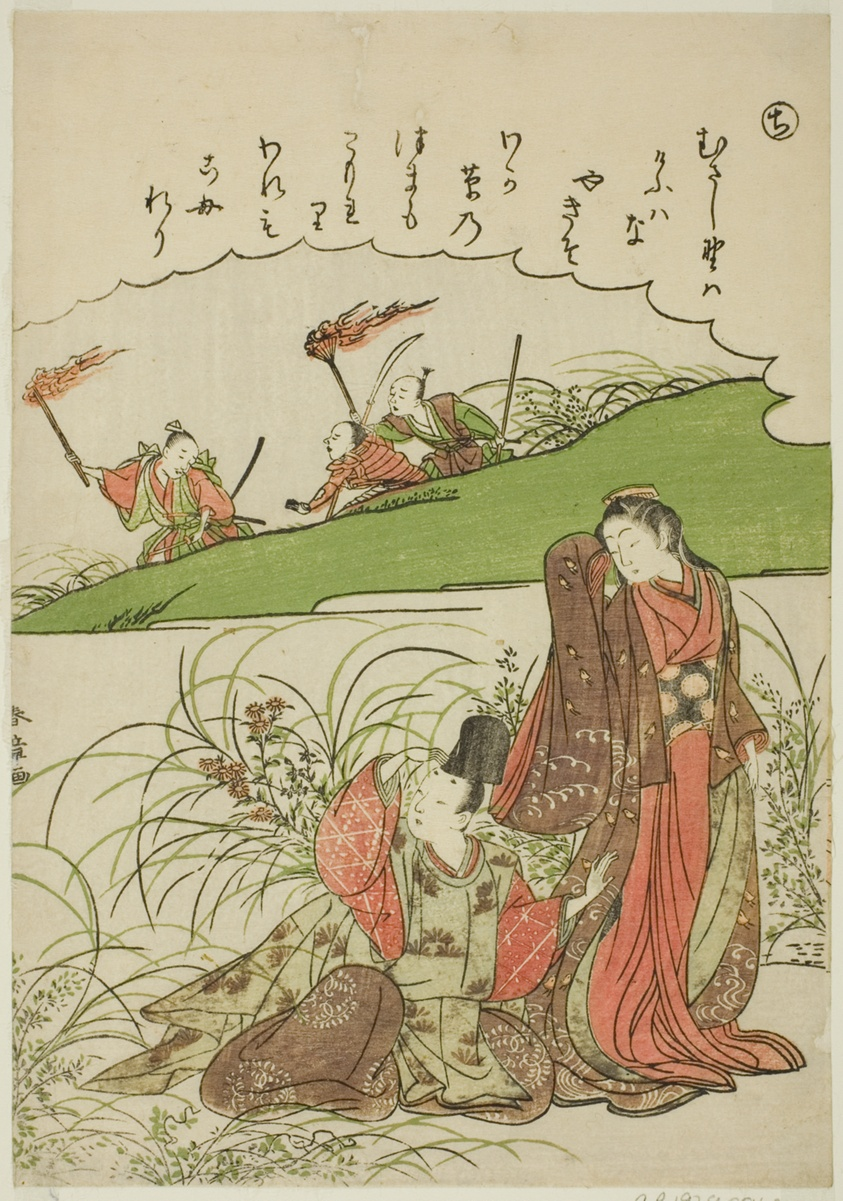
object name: Print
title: "Chi": Musashi Plain, from the series "Tales of Ise in Fashionable Brocade Pictures (Furyu nishiki-e Ise monogatari)"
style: Japanese (culture or style)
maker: Katsukawa Shunsho 勝川 春章; Japanese, 1726-1792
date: c. 1772/73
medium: Color woodblock print; koban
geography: Japan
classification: woodblock print; print; asian art